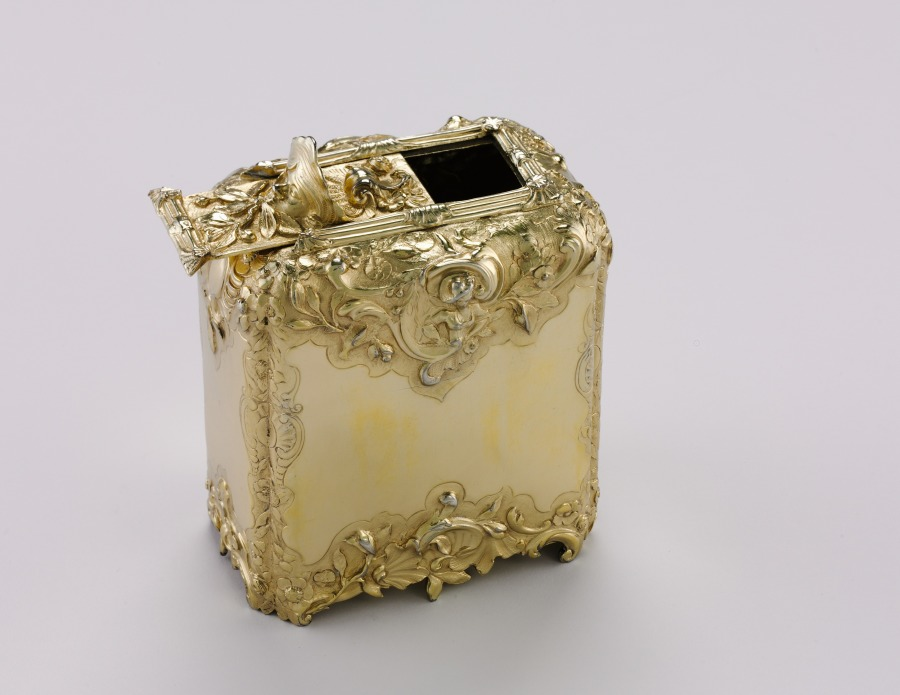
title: Tea Caddy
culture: England, London, 18th century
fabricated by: Paul Jacques de Lamerie (British, 1688–1751)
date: 1741–1742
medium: silver gilt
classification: Silver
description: In the 1600s and 1700s, silver played a significant role in projecting wealth, status, power, and ritual in British life. Tea was likewise a highly valued commodity, and as such, silver caddies like this one were designed to display the social distinction of its owner. This canister’s prominently sloping shoulders were designed by Paul Jacques de Lamerie in the early 1730s and became a standard form for tea caddies by the end of the decade.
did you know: The curving shape of this tea caddy is echoed by the scrolling lines and swirling naturalistic ornament on all four sides.